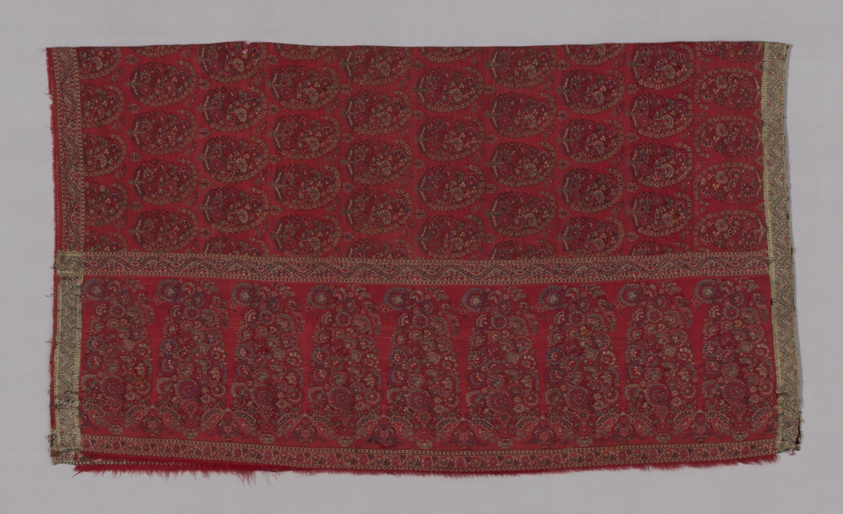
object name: Costume and Accessories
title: Shawl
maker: India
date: late 18th/early 19th century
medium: Wool, double interlocking tapestry weave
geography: India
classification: textile; weaving; costume